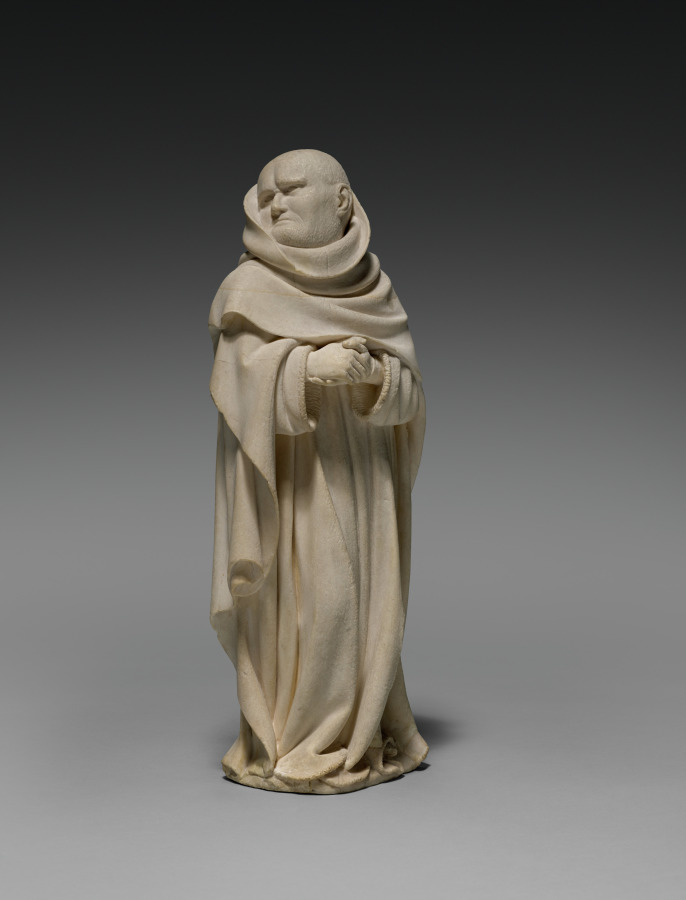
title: Mourner from the Tomb of Philip the Bold, Duke of Burgundy (1364–1404)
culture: Netherlands, active Dijon, 15th century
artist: Claus de Werve (Netherlandish, 1380–1439)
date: 1404–10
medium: vizille alabaster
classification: Sculpture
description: This figure comes from the tomb of Duke Philip the Bold from the church of Champmol near Dijon (Burgundy, France). Philip, who founded the monastery and designated it as his burial place, hired the best artists, many of whom came from the Netherlands. While the commission was given in 1381, the work was not completed until 1410, six years after the duke’s death. This mourner is unusual for the time because it is not carved as a static low relief on the pedestal of the tomb but interact with the viewers and their fellow procession members. The lifelike quality of the figure is due in large part to the alabaster. Its softness allowed artists to carve details into the material, and the transparent, milky white stone could also be polished to a high gloss.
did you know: The use of alabaster in the late Middle Ages began in the 1300s with court art in the circles of French kings, especially in the field of funerary sculpture.